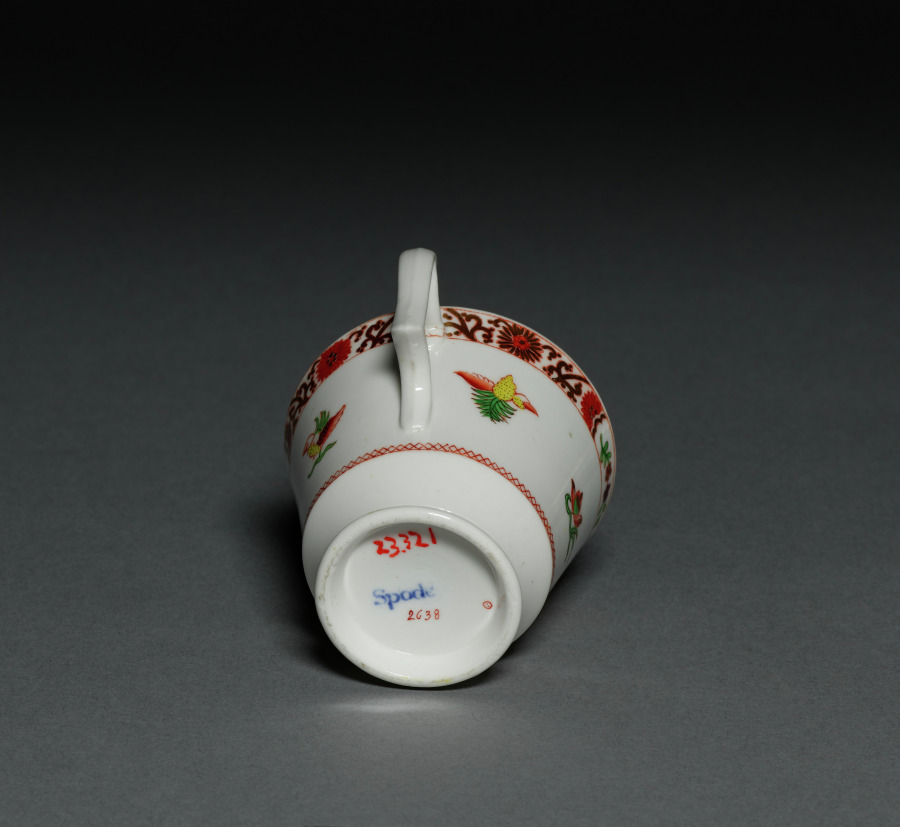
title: Cup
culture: England, Staffordshire, 18th-19th century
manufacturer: Spode Factory (British)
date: 1700s-1800s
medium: porcelain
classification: Ceramic